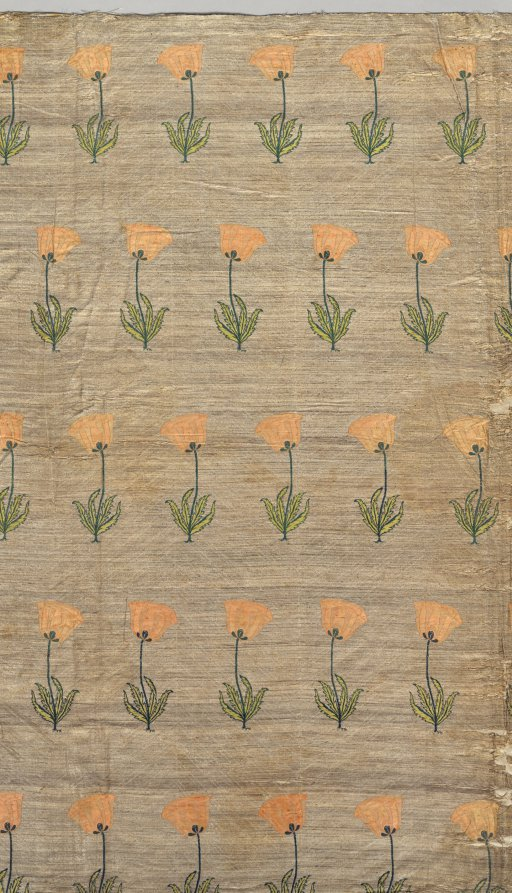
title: Textile with field of poppies on a golden ground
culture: Iran, Safavid period (1501–1722)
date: 1600–1750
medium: silk and gilt-metal thread: twill weave with supplementary weft, stamped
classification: Textile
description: Trade in textiles flourished between India and Iran. Courtly consumers from the neighboring Mughal and Safavid dynasties admired the products of both regions. The subtle chevrons set off rows of poppies that sway in alternating directions, lending a gentle liveliness to the overall pattern. Peach and green silk threads interlace to create each poppy in a technique that uses discontinuous wefts and allows for a smooth surface finish to this lightweight textile.